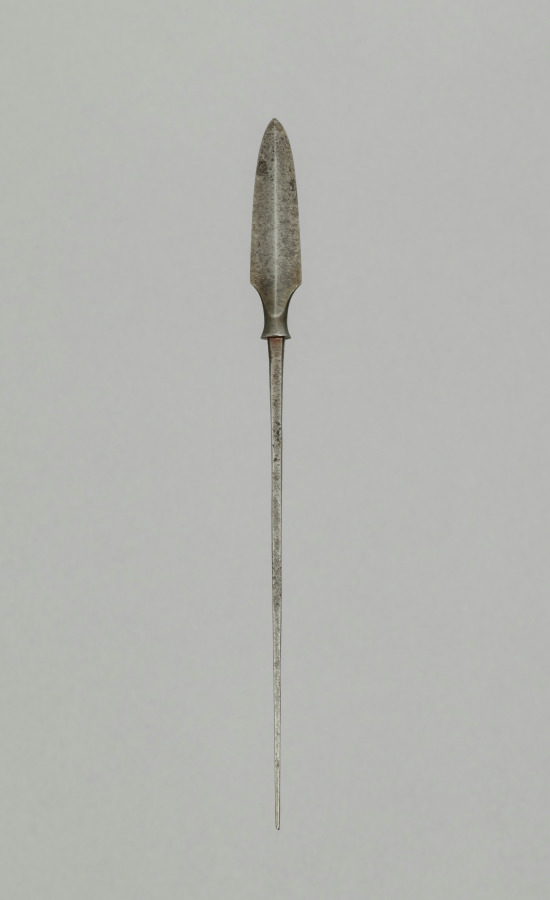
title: Arrow Point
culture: Japan, Edo period (1615–1868)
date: 1700s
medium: steel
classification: Arms and Armor